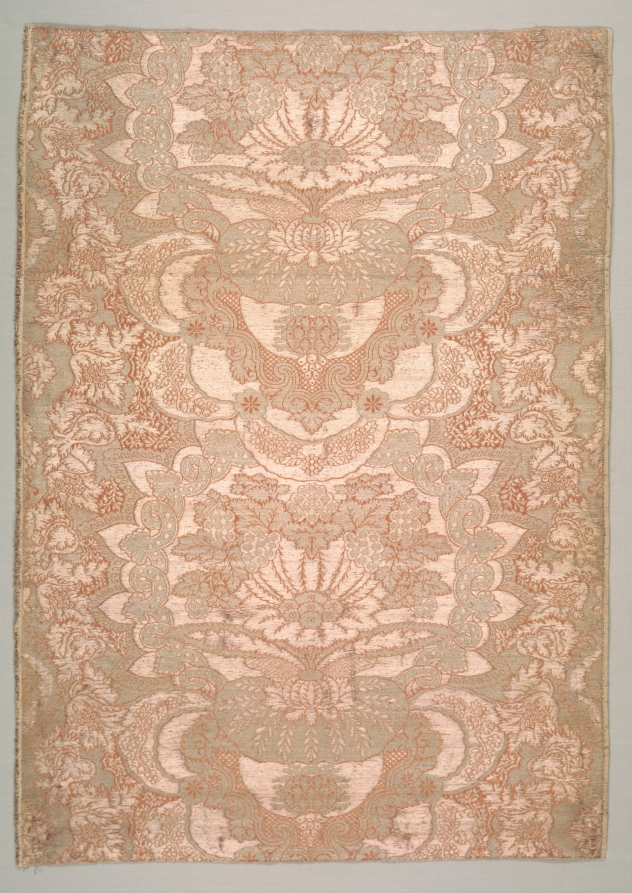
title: Textile Fragment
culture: France, early 18th century, late Baroque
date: early 1700s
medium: plain compound satin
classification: Textile